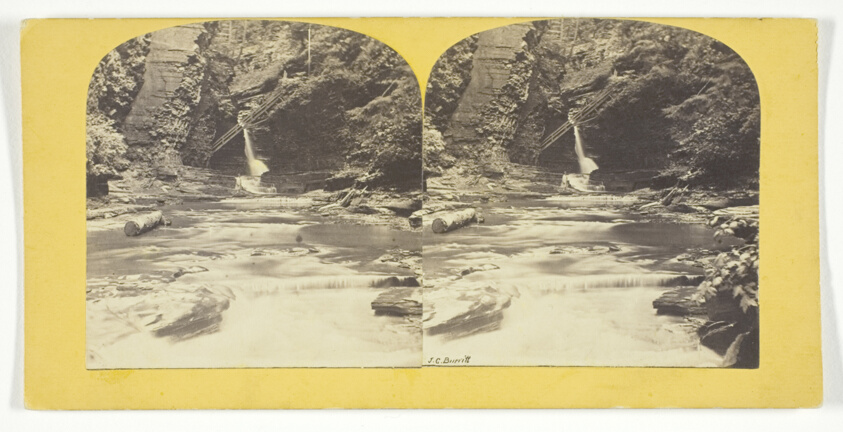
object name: Photograph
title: View in Freers, Glen of Watkins, N.Y.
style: 19th century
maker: J. C. Burritt; American, active 1860s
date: 1860/65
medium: Albumen print, stereo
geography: Ithaca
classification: photography; photograph; albumen silver print; stereograph (albumen)